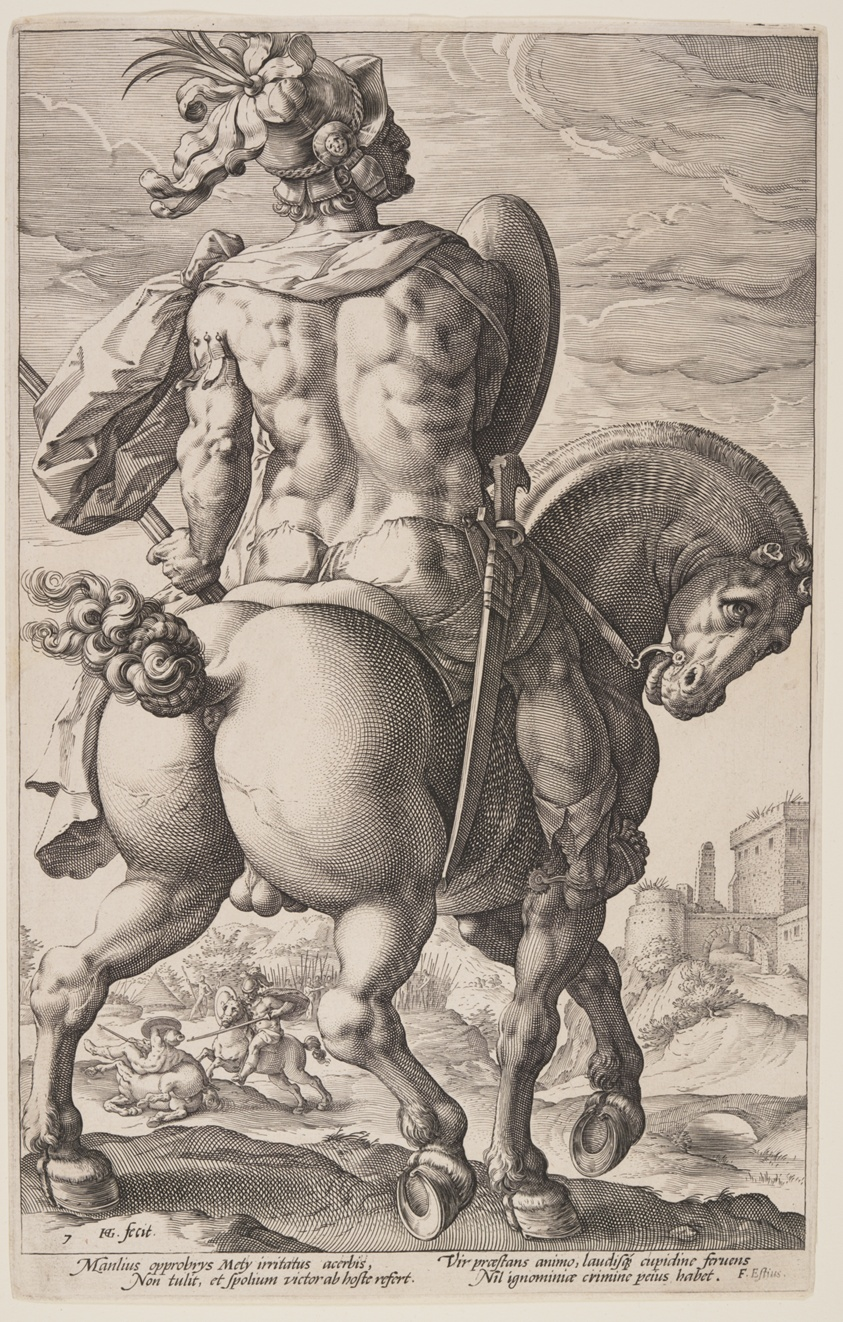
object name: Print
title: Titus Manlius on Horseback, from The Roman Heroes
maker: Hendrick Goltzius (Dutch, 1558–1617)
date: 1586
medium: Engraving on ivory laid paper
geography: Netherlands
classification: print; paper; prints and drawing; engraving